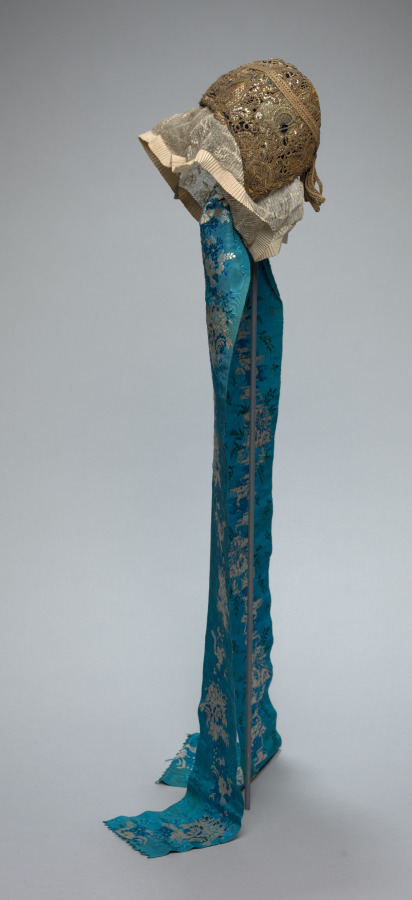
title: Headdress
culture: Germany, Buckeburg, 18th century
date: 1700s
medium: embroidery, gold thread; decorated with gold lace and streamers of moiré ribbon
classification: Garment